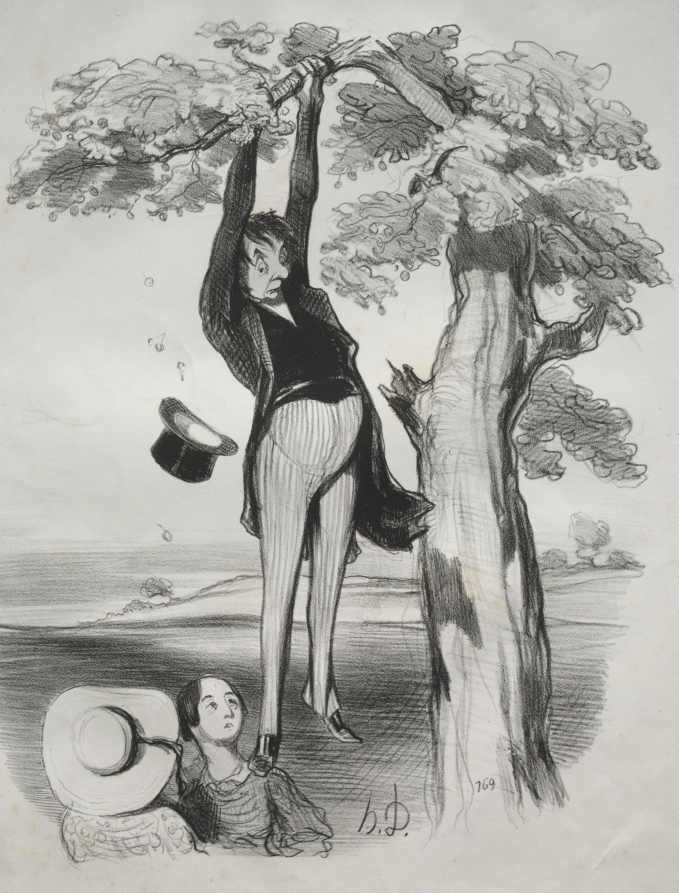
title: The hazards of shaking a plum tree too vigorously, when one too is mature.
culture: France, 19th century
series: Pastorals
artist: Honoré Daumier (French, 1808–1879)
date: 1845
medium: lithograph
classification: Print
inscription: Upper margin, in pencil: D 2217 / I / RRR ; Lower margin, in pencil: Pastorales (Pl 2) / D.2217. ; Verso, in pencil: Danger de secouer trop fortement un prunier, quand on est soi-même un homme mûr. / 28-204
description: This print (with title and captions added) was published in Le Charivari (May 29, 1845) as plate 2 from the series Pastorals.